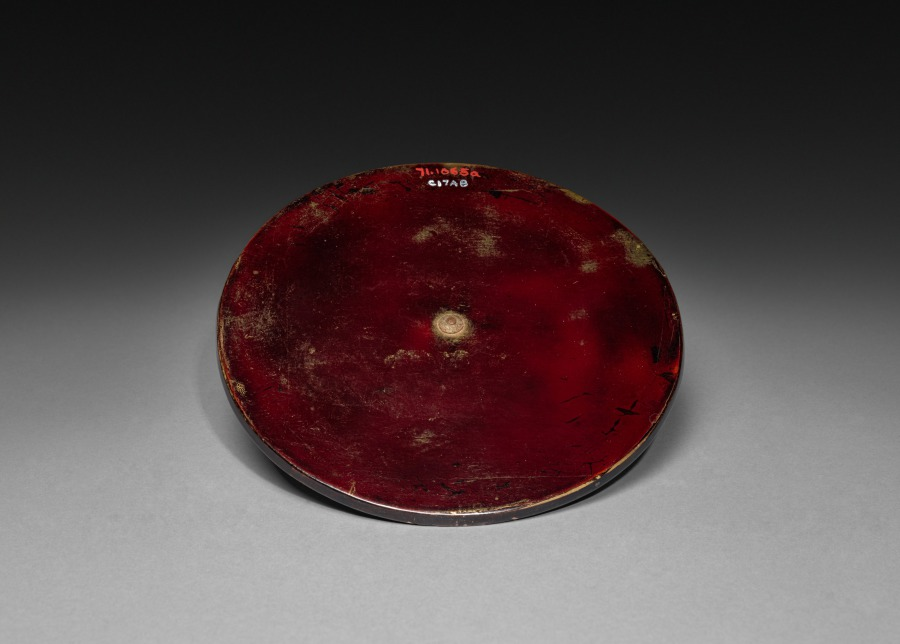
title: Wine Ewer (lid)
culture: Japan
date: late 1700's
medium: lacquer, nacre and metal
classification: Lacquer